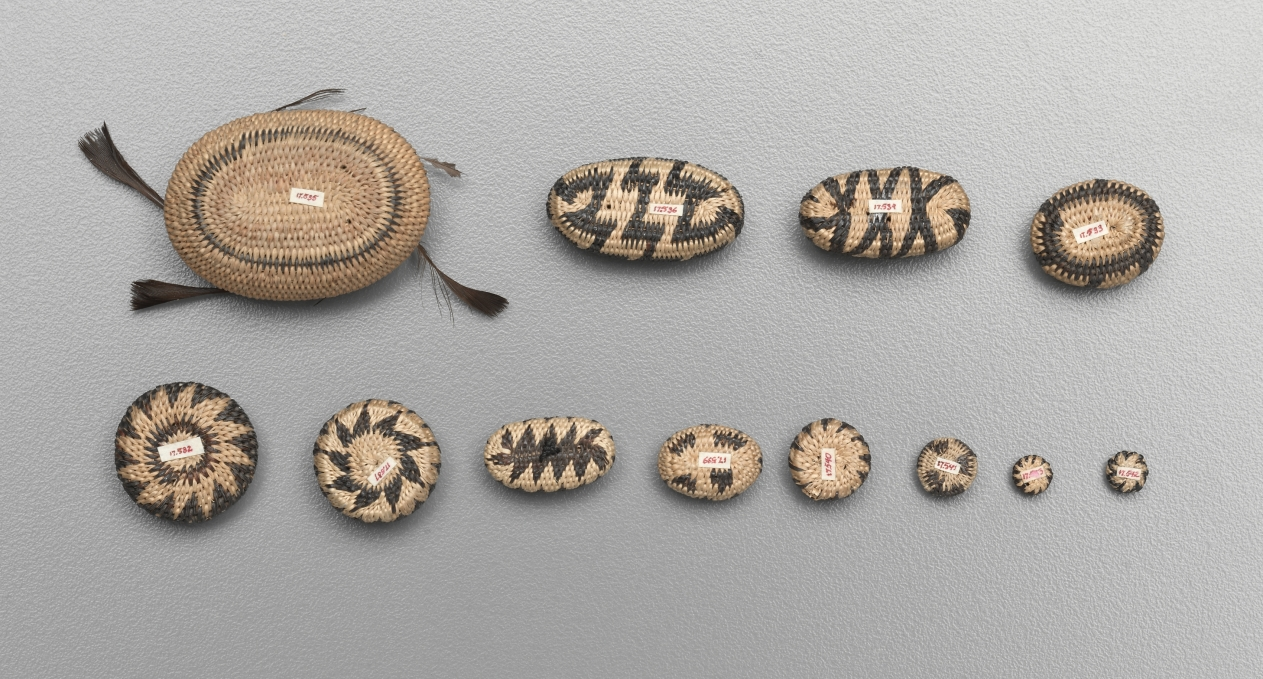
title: Miniature Round Basket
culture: California, Pomo, 20th century (?)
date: early 1900s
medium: coiled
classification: Basketry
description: Miniature baskets were made to demonstrate the basket maker’s virtuoso skill; these tiny marvels seem to be no exception—the smallest are just a few millimeters wide but still patterned. Such fine work required dexterity both in weaving and in harvesting and preparing the plant materials used to create the basket.